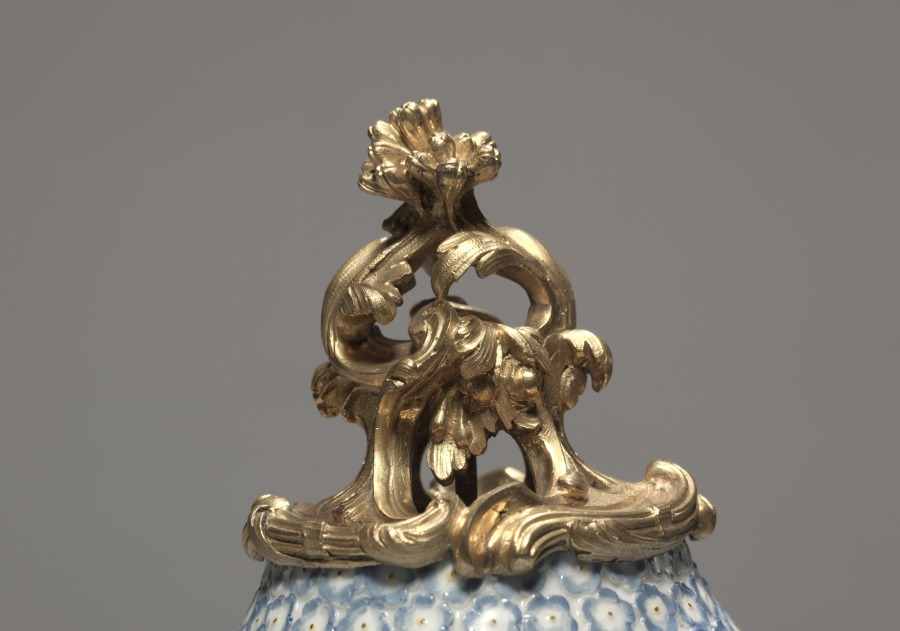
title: Cover for a Vase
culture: Germany, Meissen, 18th century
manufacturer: Meissen Porcelain Factory (German, est. c. 1710)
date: 1749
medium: porcelain mounted in gilt bronze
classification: Ceramic